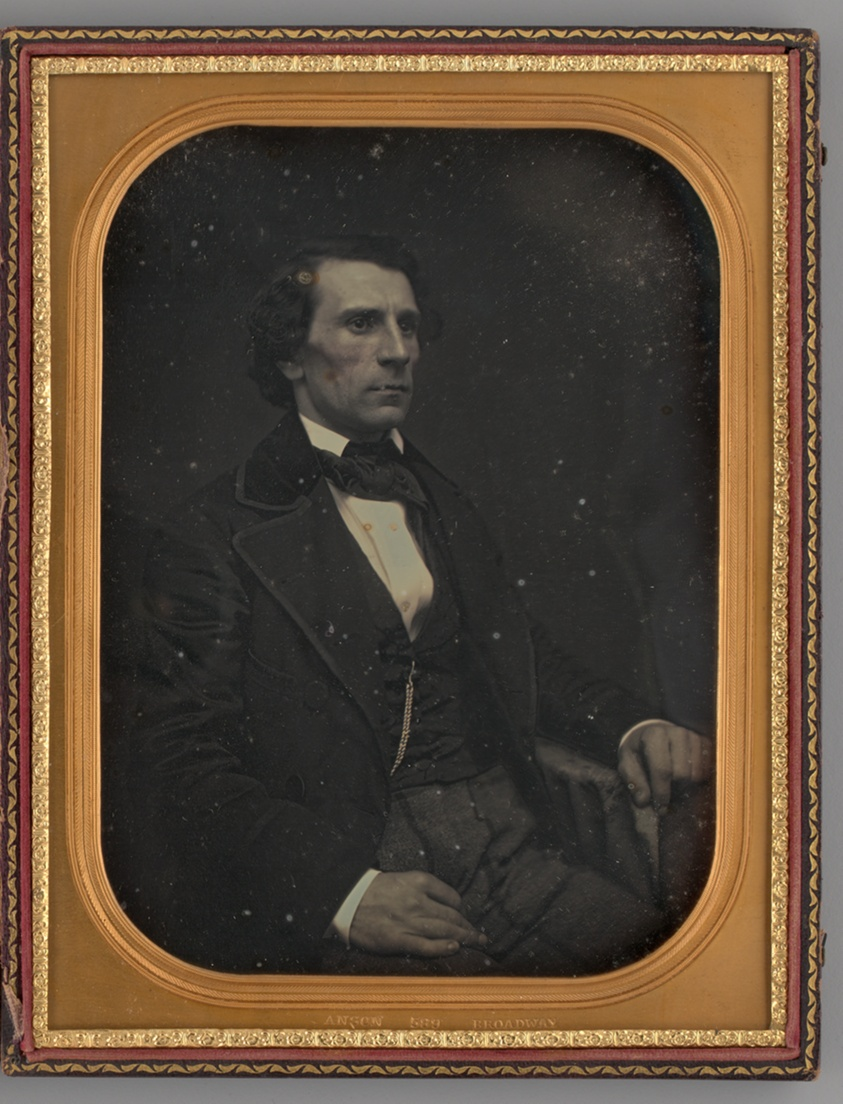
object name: Photograph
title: Untitled (Portrait of a Seated Man)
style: 19th century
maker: Rufus Anson (American, active 1851-1867)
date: 1855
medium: Daguerreotype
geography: United States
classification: portrait; photograph; photographic process; photography; portrait; daguerreotype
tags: lundberg collection, portrait, Male, bows, portraits, portraits: male subject